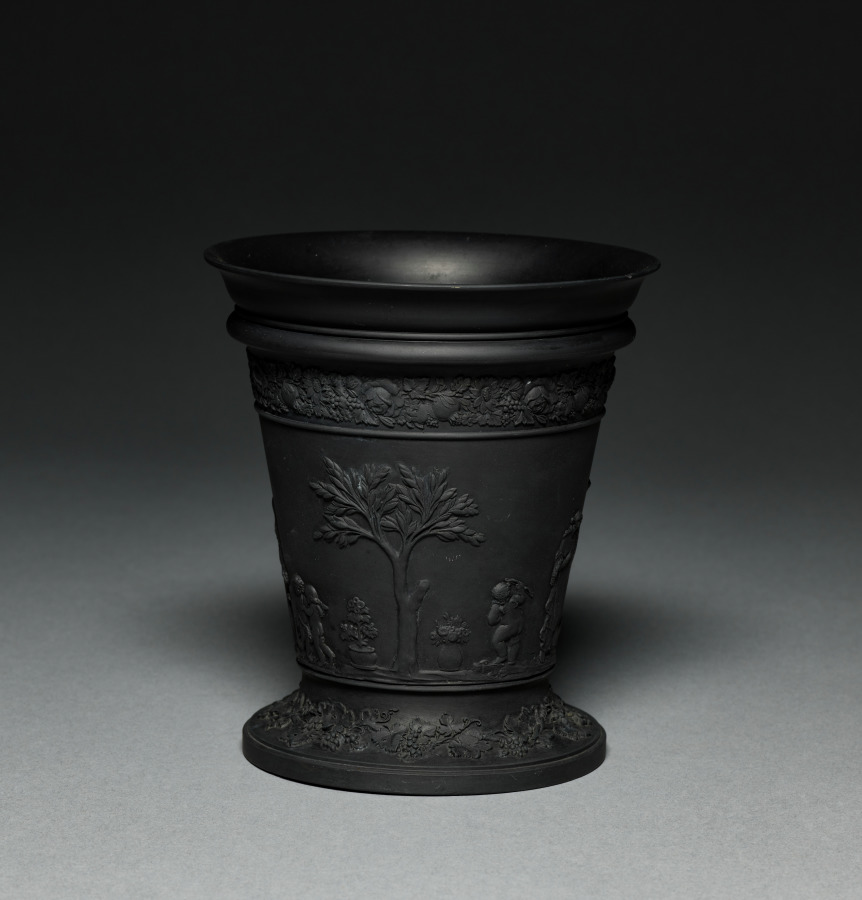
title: Jardiniere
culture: England, Staffordshire, 18th century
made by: Wedgwood Factory (British)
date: late 1700s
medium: black basalt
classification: Ceramic